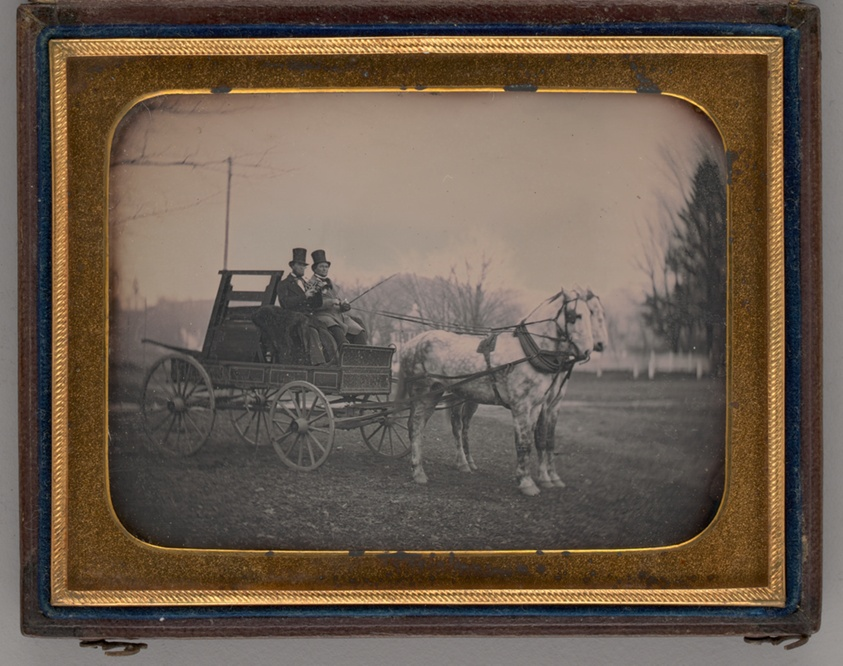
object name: Photograph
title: Untitled (Two Men with Top Hats atop a Horse-Drawn Carriage)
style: 19th century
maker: Unknown maker; American, 19th century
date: 1850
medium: Daguerreotype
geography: United States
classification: portrait; daguerreotype; portrait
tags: lundberg collection, hats, horse-drawn carriage, horsemen, horses, Male, people, portrait, portraits, portraits: male subject, portraits: multiple subjects